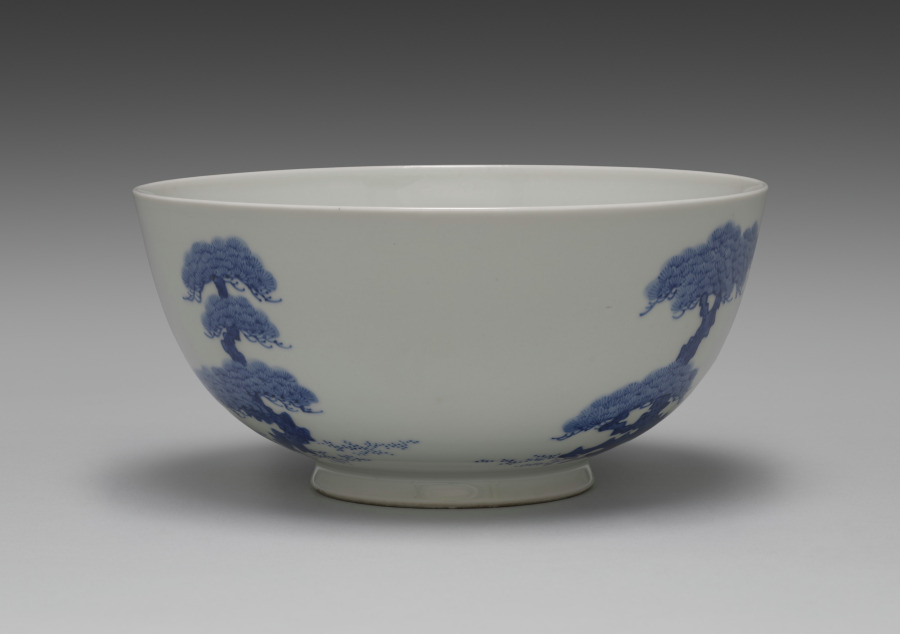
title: Bowl with Pines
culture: Japan, Meiji period (1868–1912)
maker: Seifū Yohei III (Japanese, 1851–1914)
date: 1893–1914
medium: porcelain with underglaze blue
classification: Ceramic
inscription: Inscription by Seifū Yohei IV on the box states that the bowl is the work of Yohei III.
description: The bowl has slightly more detailed surface designs painted in blue under the glaze than some other Yohei III's other teaware, like the Water Cooler with Pines, CMA 2022.163. The three pines, with two, three, and four racks of boughs respectively, have more angular rather than curved trunks, with clearly articulated bark.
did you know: The box for the bowl carries an attestation by Yohei IV that it is the work of his predecessor.